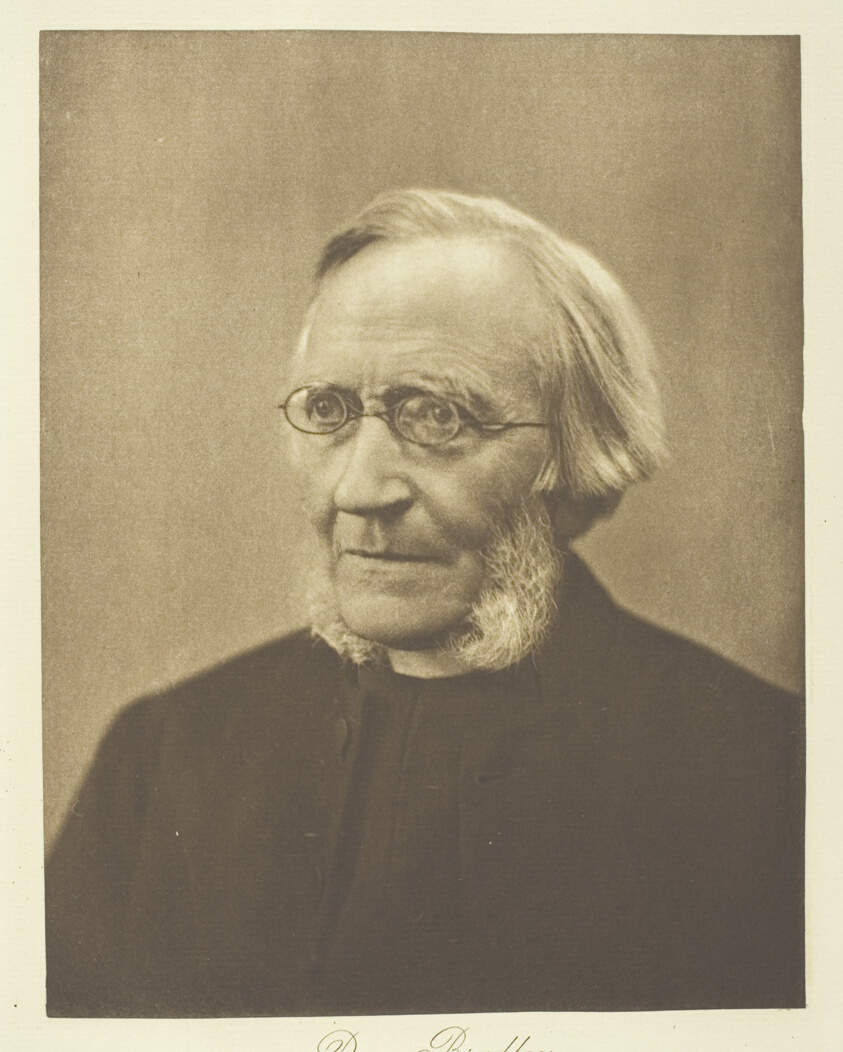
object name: Photograph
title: The Very Reverend Dean Bradley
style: 19th century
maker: Henry Herschel Hay Cameron (English, 1852–1911)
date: c. 1893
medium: Photogravure, plate 22 from the album "Lord Tennyson and his Friends" (1893)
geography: England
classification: photogravure; photomechanical process; photography; photograph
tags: Collected by Hugh Edwards, Lord Tennyson and His Friends